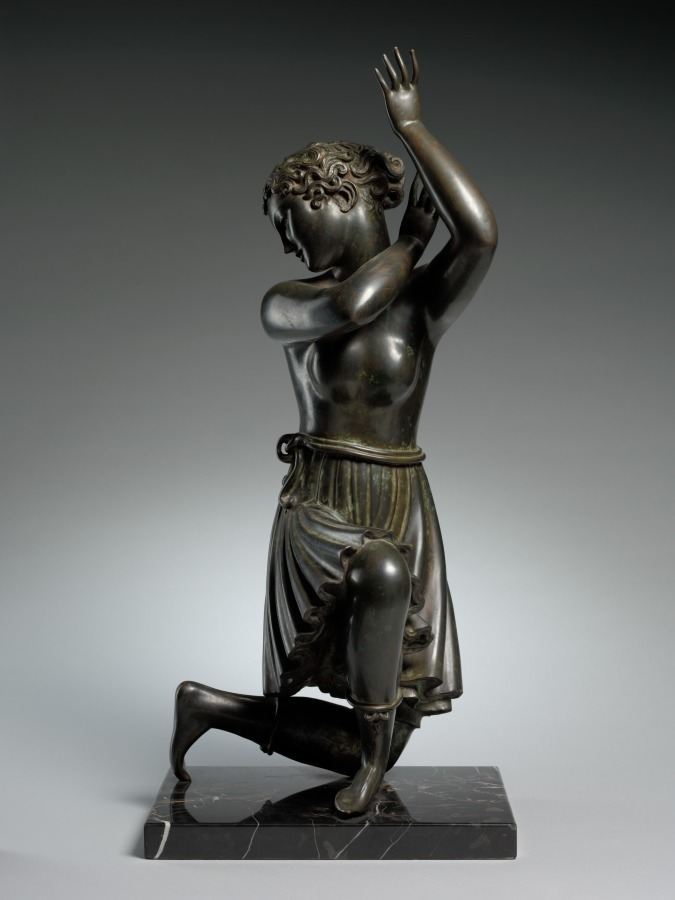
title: Dancing Figure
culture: America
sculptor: Elie Nadelman (American, born Russian Empire [now Poland], 1882–1946)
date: 1916–18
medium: bronze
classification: Sculpture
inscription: Signed: Elie Nadelman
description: Dancing Figure displays the geometrically simplified forms and softened angles that are a hallmark of Elie Nadelman’s work. Its spiraling composition presents a woman whose body partially twists on bended knee. Her raised arms echo the position of her legs.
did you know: A larger version of this sculpture was originally conceived in limestone to decorate an outdoor garden in Long Island.